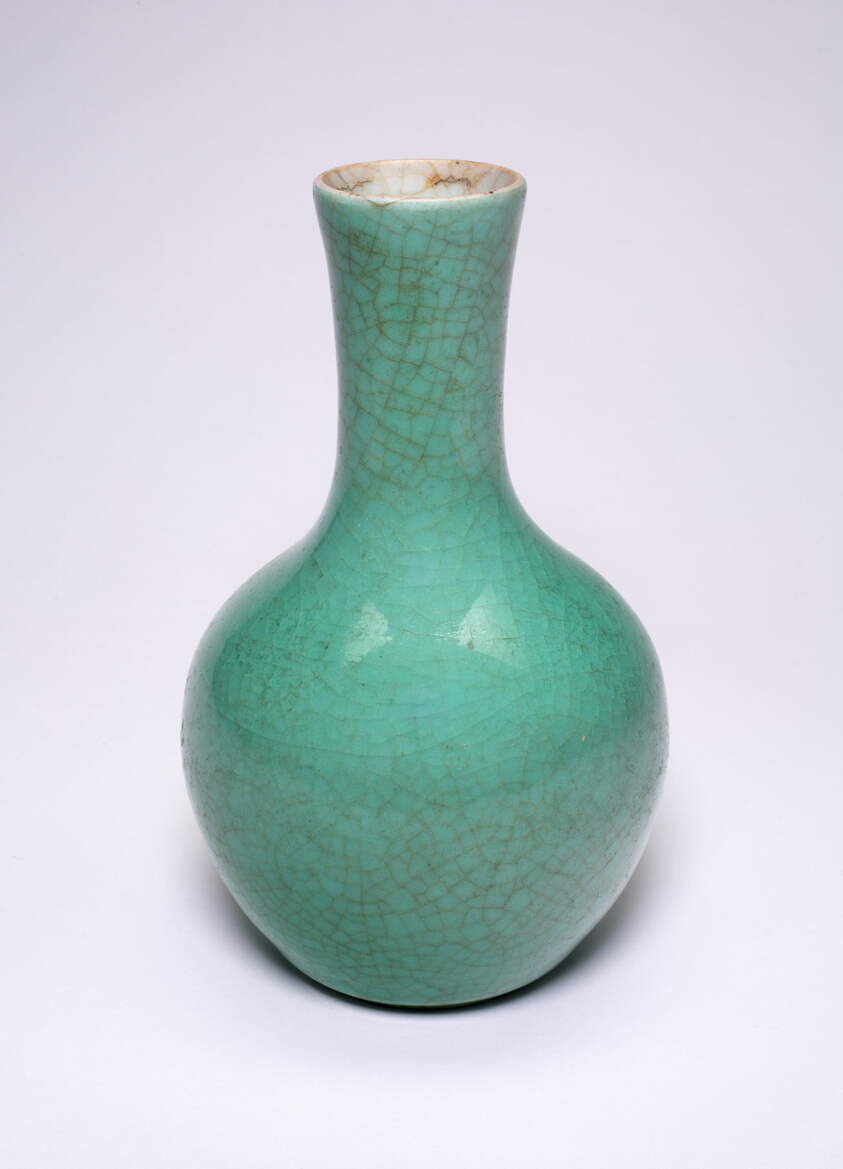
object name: Vessel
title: Bottle-Shaped Vase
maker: China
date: Qing dynasty (1644–1911), Kangxi period (1662–1722)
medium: Porcelain with green crackled glaze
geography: China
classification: porcelain; asian art; ceramics